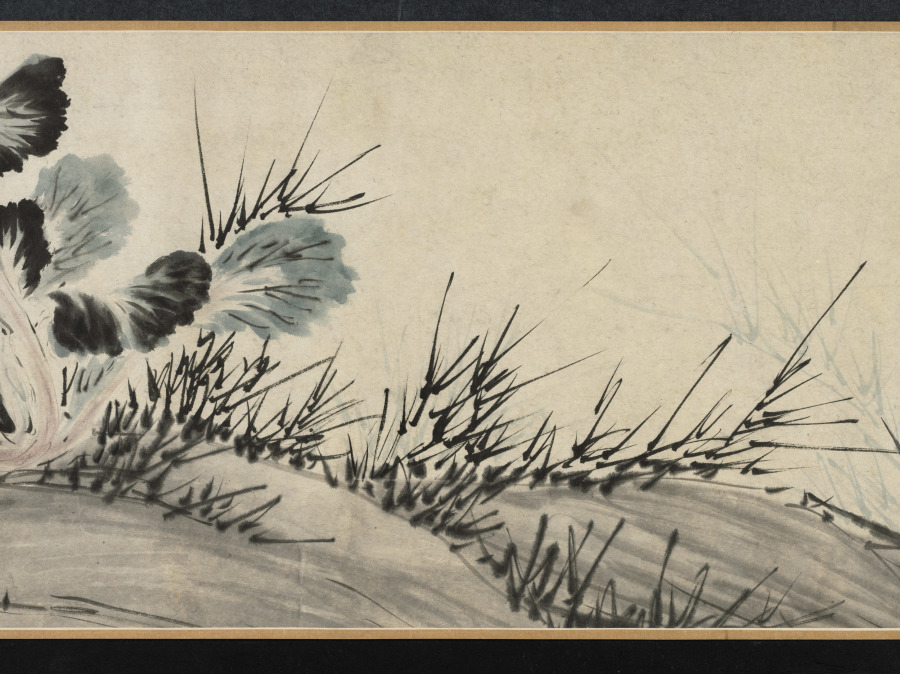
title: Chrysanthemums and Cabbage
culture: China, Ming dynasty (1368–1644)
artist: Tao Cheng (Chinese, active c. 1471–after 1502)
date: c. 1486 or before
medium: handscroll, ink and slight color on paper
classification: Painting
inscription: Artist's seal at beginning of painting: Yun hu 雲湖. Title by Wang Wenzhi 王文治 (1730–1802), date 1756. 2 seals of Wang Wenzhi 王文治 (1730-1802); 3 seals of Ku Yün (n. d.)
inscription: Section A (Chrysanthemums): 1 poem and 1 seal of Zhang Yuanzhen 張元禎 (1437–1507) - Jinshi, 1461; 1 poems and 3 seals of Ni Yue 倪岳 (1444–1501) - Jinshi, 1464; 1 poems and 2 seals of Zhao Xiang 趙祥 (life dates unknown) - Jinshi, 1469; 1 poems and 1 seals of Wu Xixian 吳希賢 (1437–1489) - Jinshi, 1464; 1 poems and 1 seals of Lü Chang 呂㦂 (1449–1511) - Juren, 1471; 1 poems and 3 seals of Fu Han 傅瀚 (1435–1502) - Jinshi, 1464; 1 poems and 1 seals of Feng Jue 馮珏 (life dates unknown) - Jinshi, 1478.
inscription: Chrysanthemums section, poem 1, by Zhang Yuanzhen 張元禎 (1437–1507): Several bushes of chrysanthemums grow in front of the Five-Willow Cottage,/ The yellow ones are really yellow and the white ones white./ This affable and decent fellow, young in years and unsophisticated,/ Has snapped one of the branches to dip in ink. (The Five-Willows Cottage was the home of the poet Tao Qian 陶潛 (Tao Yuanming 陶淵明, AD 365-427).) Chrysanthemums section, poem 2, by Ni Yue 倪岳 (1444–1501): Where at the Eastern Fence can you grieve for the Soul of the Xiang River?/ A man of upright character is mourned within the traces of ink./ White jade with a slight flaw would be a grievance forever,/ Later men should understand why even the roots of the flowers are washed. (Eastern Fence refers again to the poet Tao Qian 陶潛, while the Soul of the Hsiang River refers to the poet Qu Yuan 屈原 (c. 340–278 BC).) Chrysanthemums section, poem 3, by Zhao Xiang 趙祥 (life dates unknown): A clump of chrysanthemum grows in front of the bamboo pavilion,/ The winds of many autumns have blown since we parted beyond the river./ Straining wine through the official's cap of Tao [Qian] to prolong autumn's pleasures,/ The mists and clouds of ten thousand miles belong to the intoxicated. Chrysanthemums section, poem 4, by Wu Xixian 吳希賢 (1437–1489): It is a different spring if mulberry is planted during the latter part of the year,/ The dust of the world originally did not drop on clothing./ Who spills out ink under the Eastern Fence/ And paints so freely this portrait of chrysanthemums for the venerable Sir Tao? Chrysanthemums section, poem 5, by Lü Chang 呂㦂 (1449–1511): This full tray of ink for painting [flowers] at the Eastern Fence;/ Their whiteness or yellowness is not essential in capturing their beauty./ I don't have to go to Jiangnan to see them myself./ At my old house grow two or three branches. Chrysanthemums section, poem 6, by Fu Han 傅瀚 (1435–1502): Who daubed autumn flowers with ink/ As if they were dark dew on a branch tip only vaguely seen at evening?/ After the lazy clouds disperse, no one paints;/ A certain unconventionality pervades this painting. Chrysanthemums section, poem 7, by Feng Jue 馮珏 (life dates unknown): To satisfy his hunger, [the chrysanthemums] have at times entered the poetry of Qu Yuan;/ Taking up the wine cup, it felt close to Tao Qian./ [With them I am like] a lonely root sustained by deep water/ Or an old man to whose hair the color of youth returns.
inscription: Section B (Cabbage): 1 poem and 1 seal of Cai Qi 蔡圻 (life dates unknown) - degree information not known; 1 poems and 3 seals of Ni Yue 倪岳 (1444–1501) - Jinshi, 1464; 1 poem and 3 seals of Jiao Fang 焦芳 (1436–1517) - Jinshi, 1464; 1 poem and 3 seals of Li Dongyang 李東陽 (1447–1516) - Jinshi, 1464; 1 poems and 1 seals of Wu Xixian, signed “Xixian” 吳希賢 - Jinshi, 1464; 1 poems and 3 seals of Fu Han 傅瀚 (1435–1502) - Jinshi, 1464; 1 poems and 1 seals of Lü Chang 呂㦂 (1449–1511) - Juren, 1471; 1 poems and 2 seals of Zhao Xiang 趙祥 (life dates unknown) - Jinshi, 1469; 1 poems and 1 seals of Feng Jue 馮珏 (life dates unknown) - Jinshi, 1478.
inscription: Cabbage section, poem 1, by Cai Qi 蔡圻 (life dates unknown): The ink splashes are fresh from a frosty brush dipped in pond water;/ I can visualize that time when Yunhu 雲湖 [Tao Cheng] first showed his talents./ I lament the places where I scribbled before,/ Who would open them to inscribe a poem? (The first line is an allusion to the famous Jin dynasty calligrapher Wang Xizhi 王羲之 (AD 303-361), who practiced calligraphy so diligently at the edge of a pond that the water turned black with ink.) Cabbage section, poem 2, by Ni Yue 倪岳 (1444–1501): After rain the vegetables begin to grow;/ How are the colors of the masses lately!/ Once you get used to them, the tastiest parts are the ends of the roots;/ I don't know if they can be used for "seasoning soup." ("Seasoning soup" is an allusion to the statesmanship of a chief minister.) Cabbage section, poem 3, by Jiao Fang 焦芳 (1436–1517): This crop of purple stalks and green leaves is late and irregular;/ Now the rainy season is over for the Eastern Garden./ All the nobles nowadays dine on meat;/ Who of them knows the flavor of this [cabbage]. Cabbage section, poem 4, by Li Dongyang 李東陽 (1447–1516): It's always helped the honest man to sober up after drinks./ I intend to go to the deepest part of the stream-crossed garden/ To refresh myself in the fragrance and dew of evening. Cabbage section, poem 5, by Wu Xixian 吳希賢 (1437–1489): After rain, the white silk is filled with fragrant vegetables;/ How many times this happens in Mr. Tao's paintings./ On whom will you depend to present a memorial to the ruler?/ Don't let this color emerge on the faces of the people. (The last line is meant as a warning to officials: the color of the vegetables (green) may be pleasing in itself, but when it emerges on the faces of the starving poor, it signifies a badly governed world.) Cabbage section, poem 6, by Fu Han 傅瀚 (1435–1502): For twenty years I have feasted on the excellent mutton of an official;/ Yet I talk and dream about the garden and its vegetables./ Do not merely say it is good to chew the root of the cabbage--/ You must taste to understand what poverty is. Cabbage section, poem 7, by Lu Chang 呂㦂 (1449–1511): The capital is never a place for an apprentice in the "garden of scholarship."/ Who would write about gardens and vegetables on an examination paper?/ I've walked throughout the country in spring;/ Make sure the people don't show this color. Cabbage section, poem 8, by Zhao Xiang 趙祥 (life dates unknown): After a wash of rain, the spring garden is still in order;/ The flavor [of the cabbage] is more suitable with a small drink and the hum of a tune./ The rich and powerful in their mansions consume dish after dish of meat;/ Vegetarian food is known only by the scholars. Cabbage section, poem 9, by Feng Jue 馮珏 (life dates unknown): A new cabbage is nourished with dew;/ It takes a long time to grow and mature./ The business of "seasoning the soup" is your responsibility;/ Better command the gardener to take care [of the cabbages]. trans. HK/LYSL/WKH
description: On an autumn day in Beijing, Tao Cheng had a gathering with a group of scholar-officials and created two paintings in a spontaneous, casual style. The first depicts chrysanthemums, slender bamboo stalks, and a rock in monochrome ink. Tao applied light colors for the second painting that depicts cabbage. Tao deliberately placed the images on the first sections of the paper so that his honorable guests could add their poetic inscriptions inspired by his imagery. In the first section to the right, all seven poetic inscriptions refer to the beloved poet and recluse Tao Qian (also called Tao Yuanming, AD 365–427) who was particularly known for his profound love for chrysanthemum flowers. Most of the inscriptions in the second section express sympathy for the poor, since cabbage is the main ingredient in their humble food. Taken together, the poems and paintings allude to the life and responsibilities of the scholar-official: the importance of both an upright character and a concern for the poor citizens in order to achieve good government.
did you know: Eminent calligrapher Wang Wenzhi 王文治 was only 27 sui when he wrote the title in 1756.